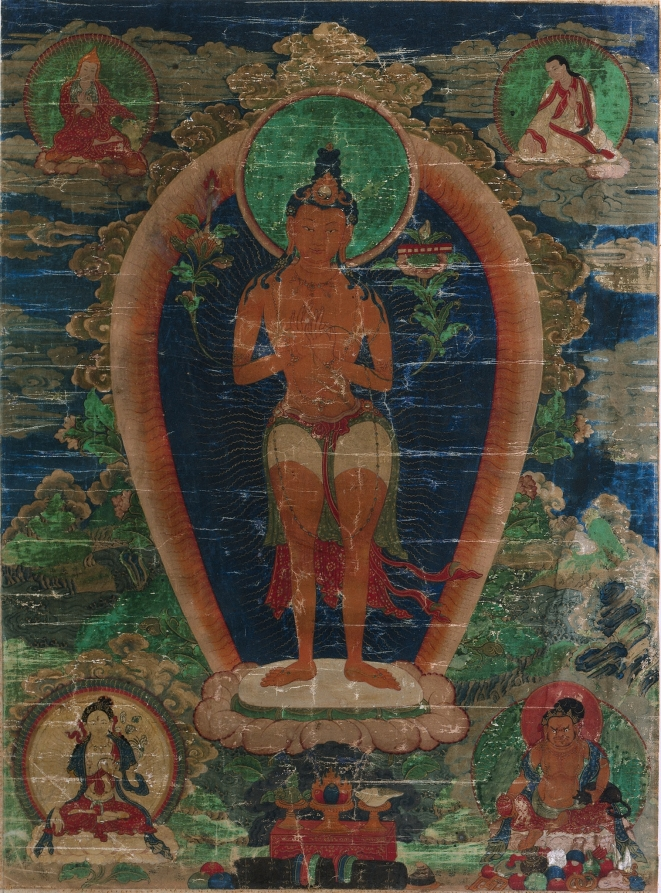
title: Bodhisattva Padmapani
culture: Tibet, 18th century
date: early 1700s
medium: ink and slight color on cotton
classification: Painting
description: a